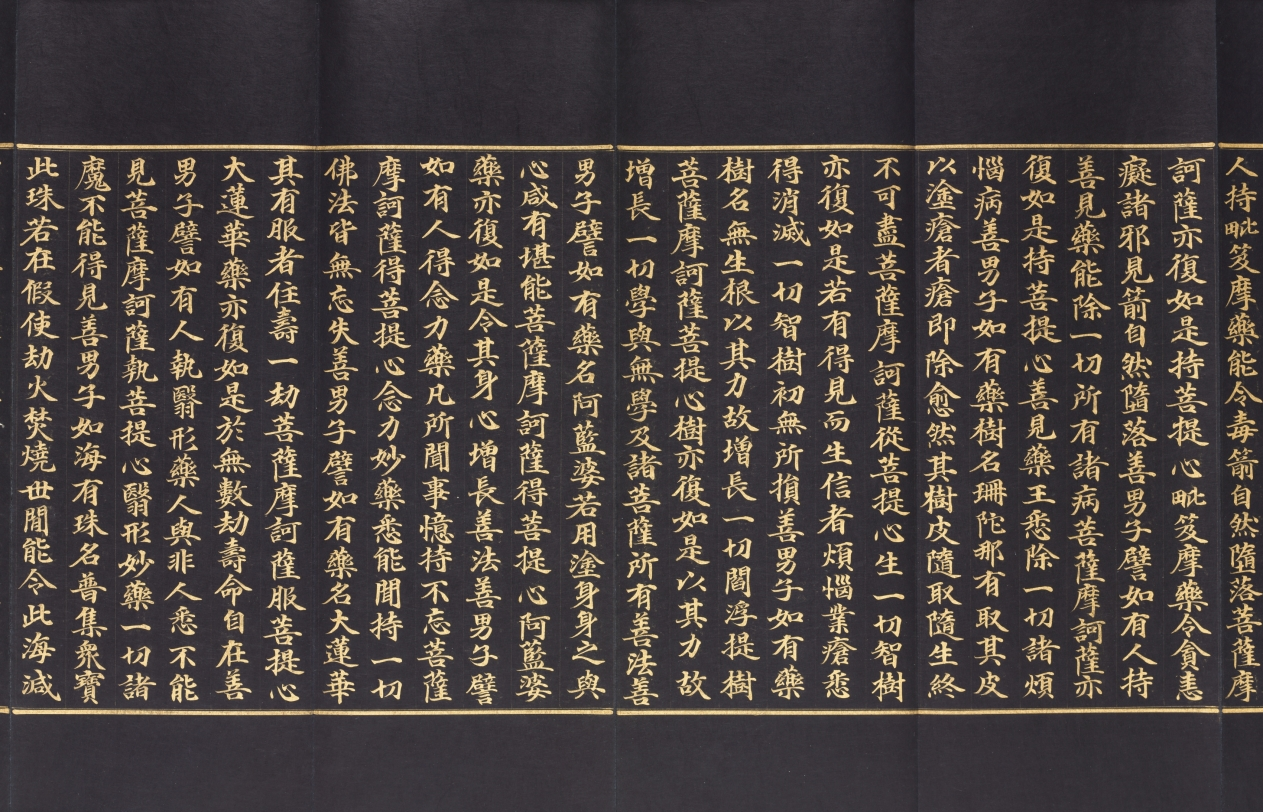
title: Avatamsaka Sutra No. 78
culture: Korea, Goryeo dynasty (918–1392)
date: 1300s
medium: Folded book with illustrated frontispiece; gold and silver on mulberry paper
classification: Bound Volume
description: This illuminated manuscript presents one part of the multivolume sacred text titled Avatamsaka (Flower Garland) sutra. Both the script and the image are rendered in gold ink on the smooth surface of the dark blue, indigo-dyed mulberry paper. This portion of the text, which reads from right to left, describes the encounter of the Buddha of the Future (Maitreya) and the young pilgrim Sudhana. The Buddha gives his words of wisdom to Sudhana, who asks questions about the path toward spiritual awakening. Mixed with ink and glue, the gold has a brilliance that strikingly reflects Sudhana’s ardent quest for understanding the way to reach enlightenment.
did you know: The pristine condition of this manuscript indicates that it was rarely used after its creation, revealing that the act of making a manuscript rather than reading it was the main religious goal.